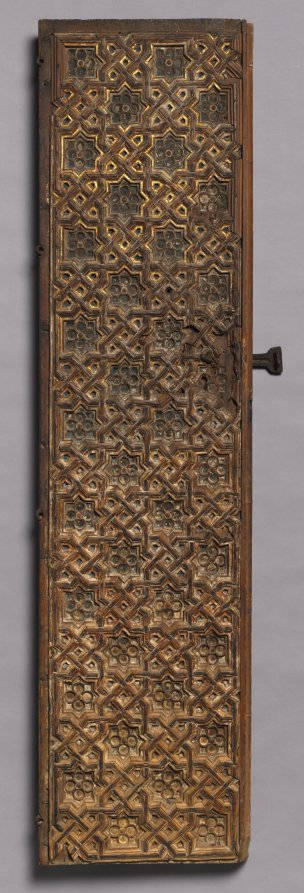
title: Door (left)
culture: Spain, early 15th century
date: early 1400s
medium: gilded and painted wood (pine)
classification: Furniture and woodwork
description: Typical of Muslim-inspired ornamentation, these doors reflect a love of geometric decoration stemming from a non-realistic artistic tradition. They consist of applied wood strips that form eight-point stars, flowers, and geometric interlace designs. Such designs are reflected in the tiles, ceramic vessels, and metalwork of Muslim-occupied Spain. The origin of the doors is not known, but they may have belonged to a palace or domestic residence. In 711, the Moors had invaded and conquered nearly the entire peninsula. During the next 750 years, independent Muslim states were established, and the entire area of Muslim control became known as Al-Andalus. Muslim philosophers and scientists developed knowledge in areas like medicine, optics, algebra, chemistry, and geometry, as seen here. Typical of Muslim-inspired ornamentation, these doors reflect a love of geometric decoration stemming from a non-realistic artistic tradition. They consist of applied wood strips that form eight-point stars, flowers, and geometric interlace designs. Such designs are reflected in the tiles, ceramic vessels, and metalwork of Muslim-occupied Spain. The origin of the doors is not known, but they may have belonged to a palace or domestic residence.